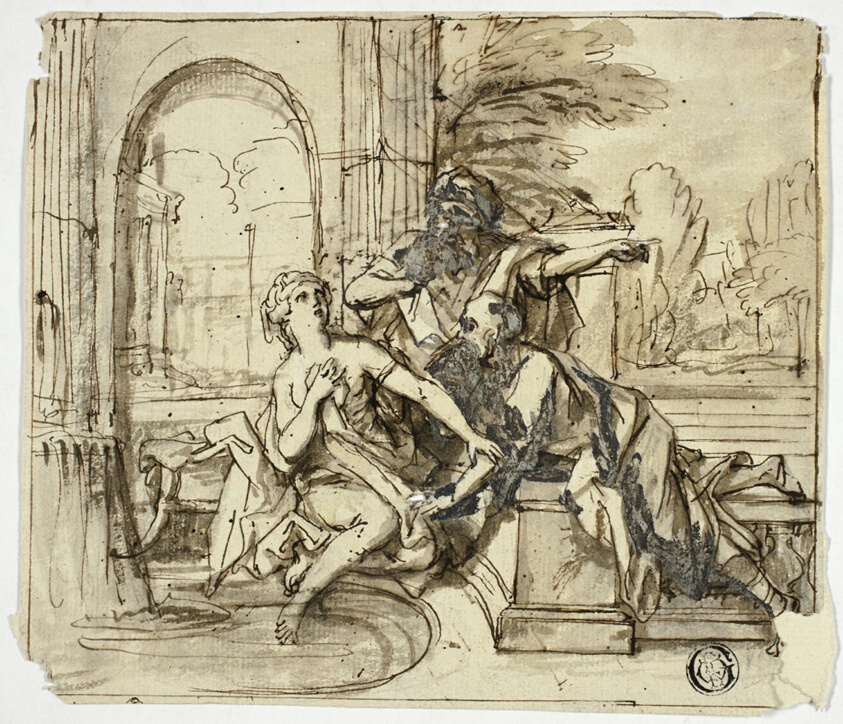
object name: Drawing and Watercolor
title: Susanna and the Elders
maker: Unknown Artist; Dutch, 18th century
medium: Pen and brown ink, with brush and brown wash, heightened with lead white (discolored), on ivory laid paper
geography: Holland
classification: pen and ink drawings; drawings (visual works); prints and drawing